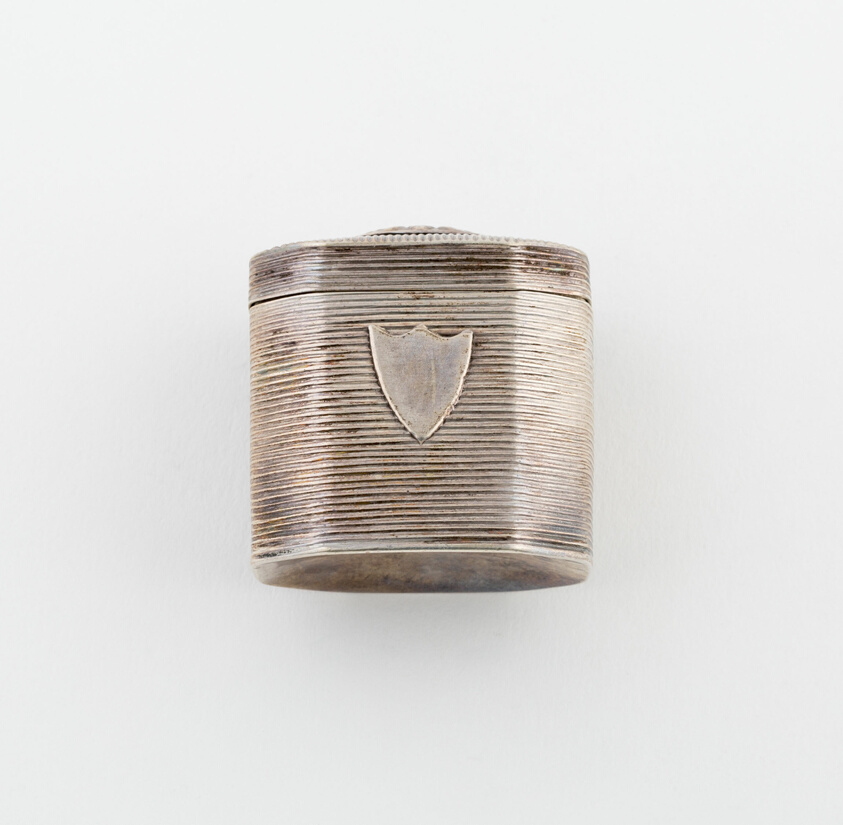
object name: Metalwork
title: Sponge Box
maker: Possibly Eliaser Efraim Denekamp; Dutch, active c. 1837-c. 1865; Possibly Schoonhoven, Netherlands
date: 1847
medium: Silver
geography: Netherlands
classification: container for personal use; box; european decorative arts; metalwork; silver; decorative object/ornament